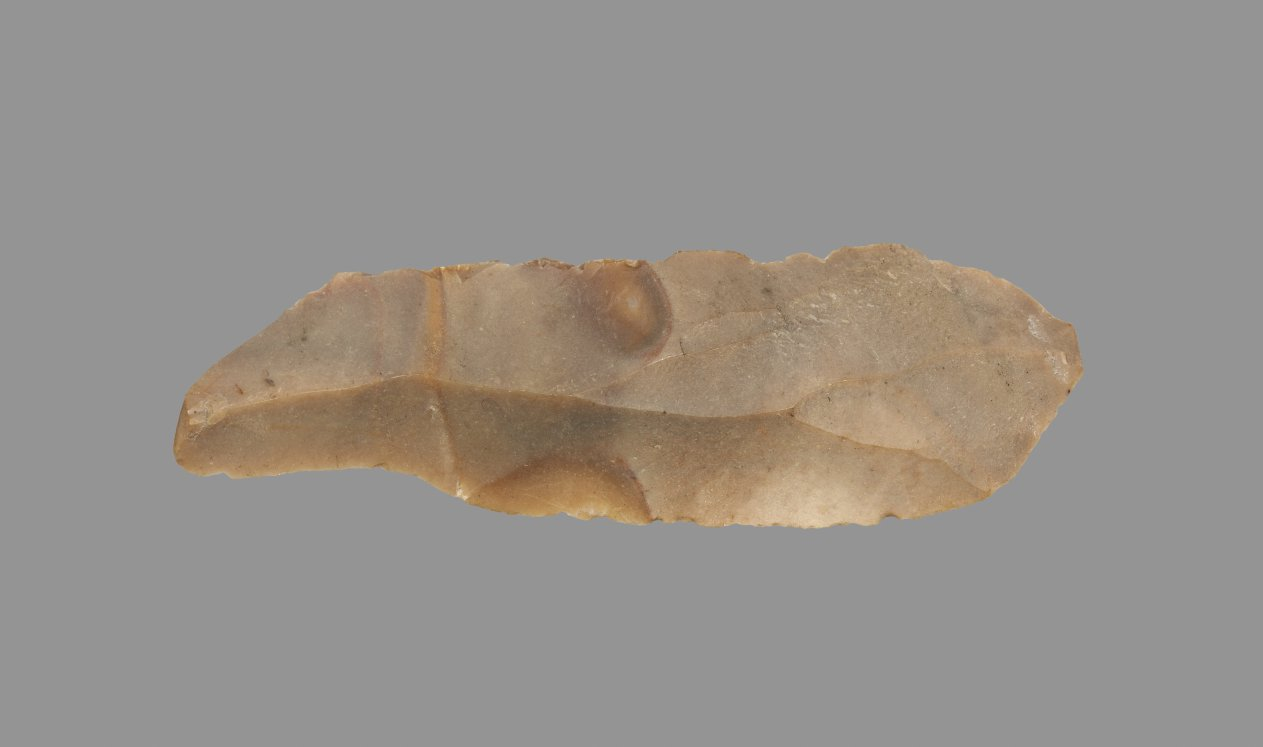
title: Sickle Blade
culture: Egypt, Middle Kingdom (2040–1648 BCE), Dynasty 12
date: 1980–1801 BCE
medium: flint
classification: Implements